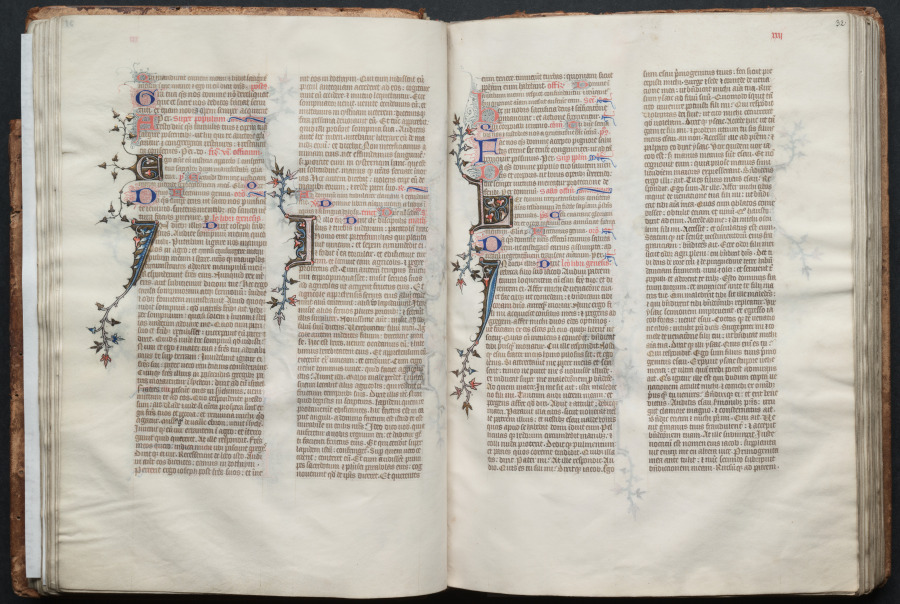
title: The Gotha Missal: Fol. 32r, Text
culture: France, Paris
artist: Master of the Boqueteaux (French)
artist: and Workshop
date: c. 1375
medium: ink, tempera, and gold on vellum; blind-tooled leather binding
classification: Bound Volume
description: The style and quality of this manuscript's decoration is typical of deluxe Parisian books made for aristocratic or royal patrons. Most of the book's decoration appears to be the work of the Master of the Boqueteaux, an artist active at the court of King Charles V (died 1380). His style was apparently shared by a number of book illuminators working in and around Paris. It is very possible that the Gotha Missal belonged to Charles V, but is not provable because the manuscript has no royal portraits and lacks a colophon. Given the book's magnificent decoration, however, it would seem that it was produced for a Valois prince, if not for the king himself. The manuscript receives its name from the German dukes of Gotha, its later owners.